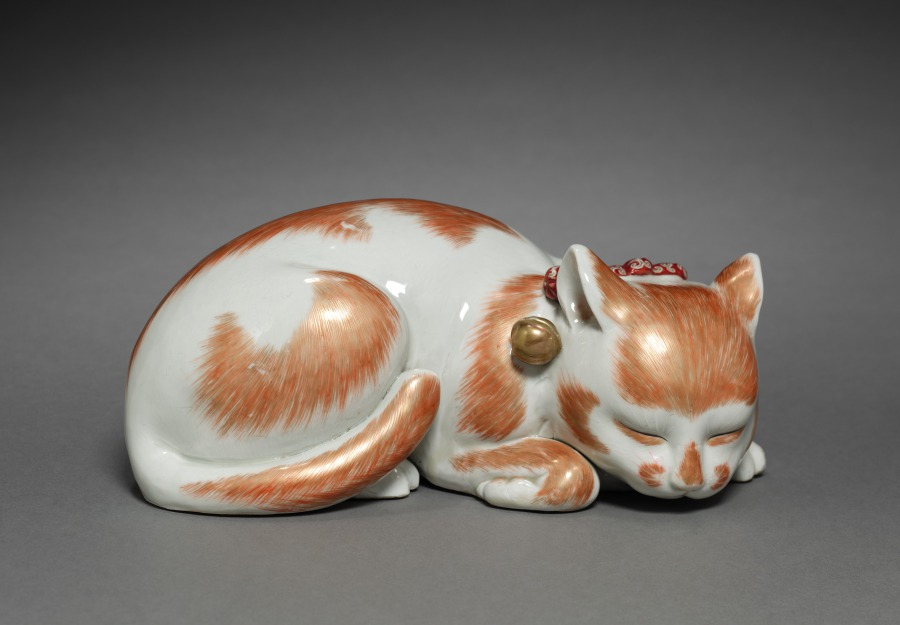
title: Sleeping Cat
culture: Japan, Edo period (1615–1868)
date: early to mid-1800s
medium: Porcelain with overglaze color enamel and gold (Hizen ware)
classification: Sculpture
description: Models of sleeping cats with collars and bells like this one were popular as decorative objects, and some of them also served as incense burners or hand warmers. This cat was just for display and has very carefully incised lines in the surface of the clay body, as well as thin strokes of orange and gold over the glaze to create the sense of soft fur.